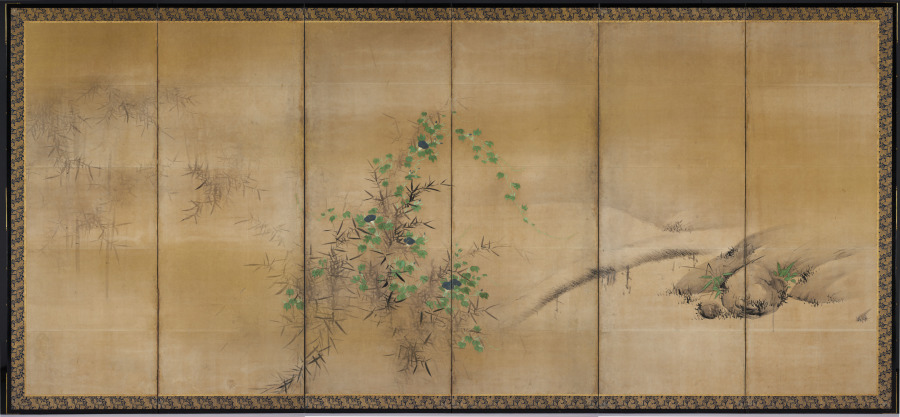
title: Winter and Summer Flowers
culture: Japan, Momoyama period (1573–1615)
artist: Kaihō Yūshō (Japanese, 1533–1615)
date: c. 1600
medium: One of a pair of six-panel folding screens; ink, color, and gold on paper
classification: Painting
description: White camellias bloom behind a large pine in the right screen and blue morning glories creep through bamboo in the left screen of this composition. The mountains and bridge suggest a continuous landscape, but the paintings actually juxtapose flowers of winter and summer, with time progressing from right to left. Kaihō Yūshō painted similar landscapes for Zen temples in Kyoto.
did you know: The pine and bamboo are defined by ink wash, but the flowers take form through color within contour lines.